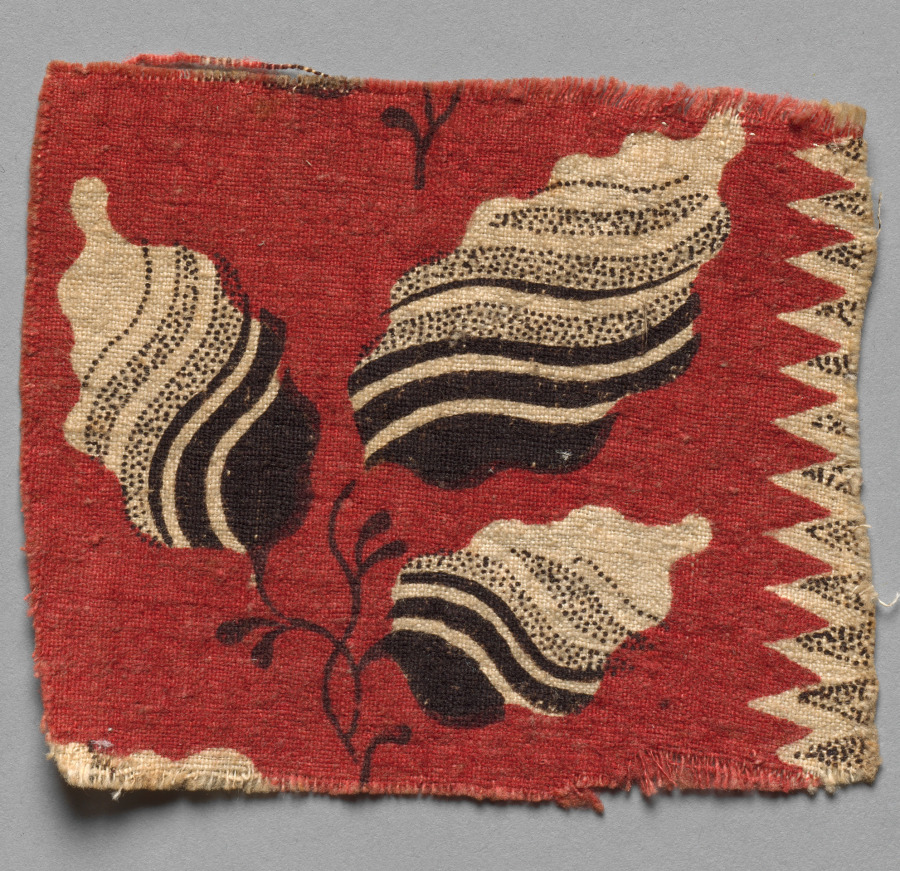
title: Fragment of Printed Cotton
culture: America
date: 18th century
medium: printed cotton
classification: Textile